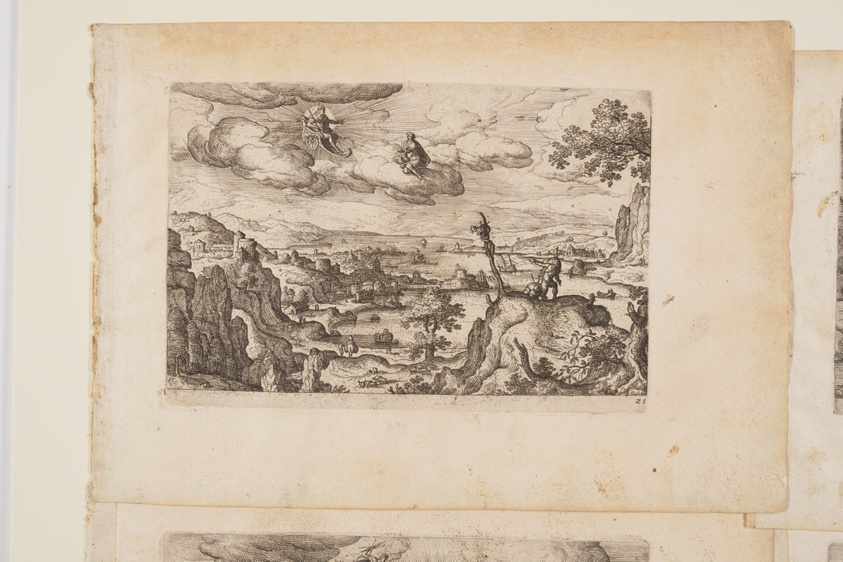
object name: Print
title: Plate 25, from Landscapes with Scenes from the Old and New Testament and Ovid’s Metamorphoses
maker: Hans Bol (Flemish, 1534–1593); published by Philip Galle (Flemish, 1537–1612)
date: 1574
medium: Etching on ivory laid paper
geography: Flanders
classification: print; paper; prints and drawing; etching